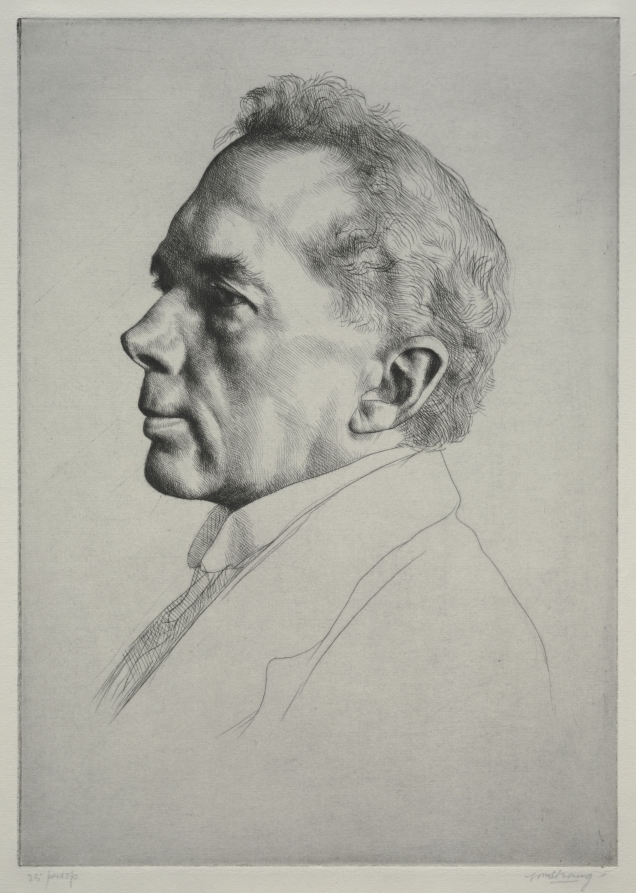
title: Campbell Dodgson, Profile to the Left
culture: England, 20th century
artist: William Strang (British, 1859–1921)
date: 1919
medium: engraving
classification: Print